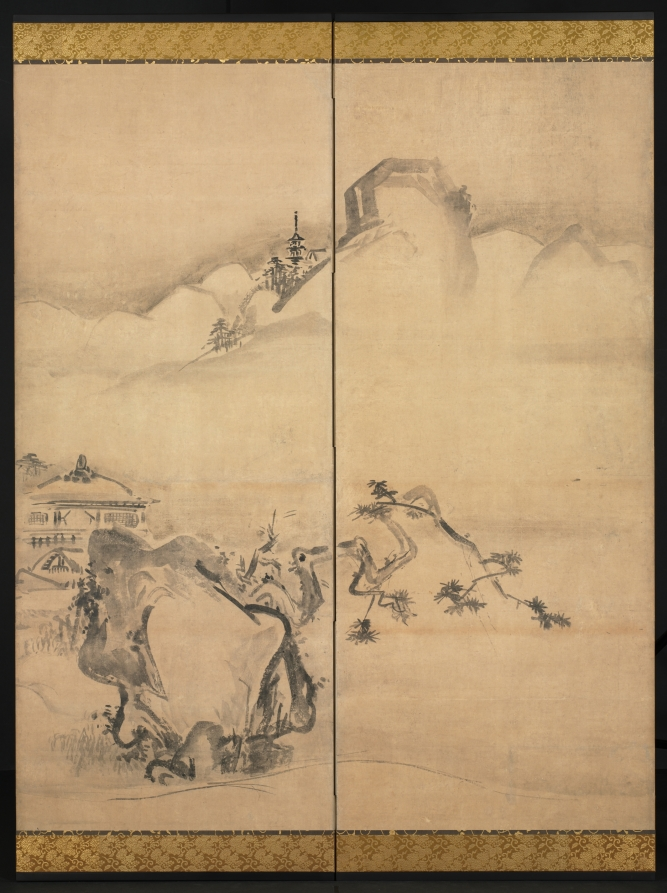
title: Eight Views of the Xiao and Xiang Rivers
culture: Japan, Edo period (1615–1868)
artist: Watanabe Shikō (Japanese, 1683–1755)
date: 1700s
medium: Six-panel folding screen; ink on paper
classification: Painting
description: Watanabe Shiko enjoyed a versatile and successful career, as well as a privileged upbringing, in Kyoto. His surviving work indicates a capacity to diligently study, master, and then interpret several painting techniques—each of which varies considerably in appearance. These byobu (folding screens), for instance, reflect training in the Kano school idiom that favored a monochromatic ink palette, vigorous brushwork, and traditional Chinese—rather than Japanese—subject matter. Shiko rendered this scenery in a particularly expansive manner, suggesting the vastness of China's topography relative to Japan's. Frequent visitors to the museum will recall that Shiko also painted the collection's favored pair of byobu, the Irises (CMA 1954.603).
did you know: This screen forms a pair with CMA 1968.267.